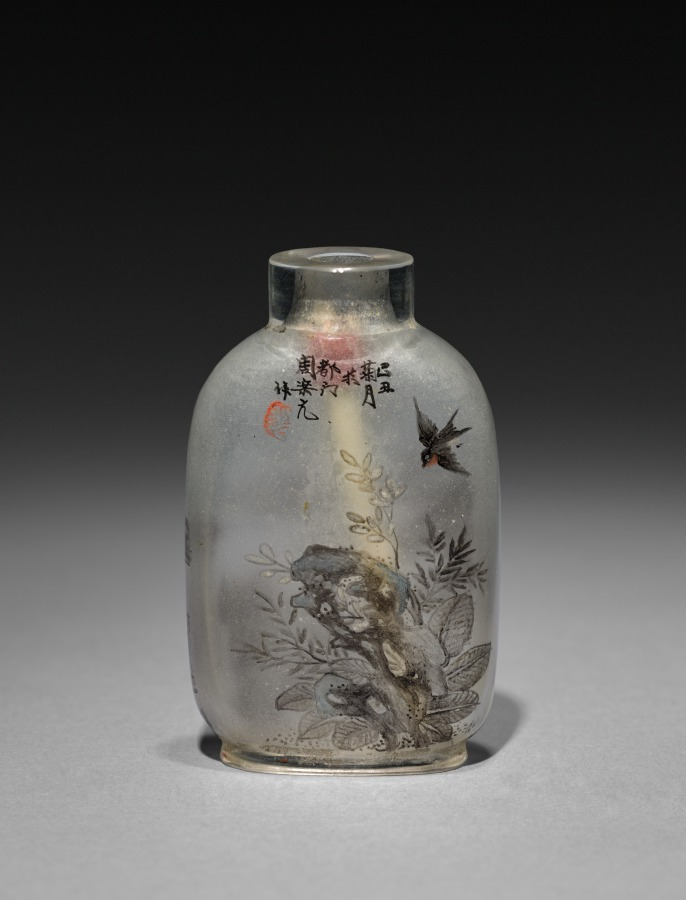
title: Snuff Bottle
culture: China, Qing dynasty (1644-1911)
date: 1644–1911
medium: glass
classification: Glass